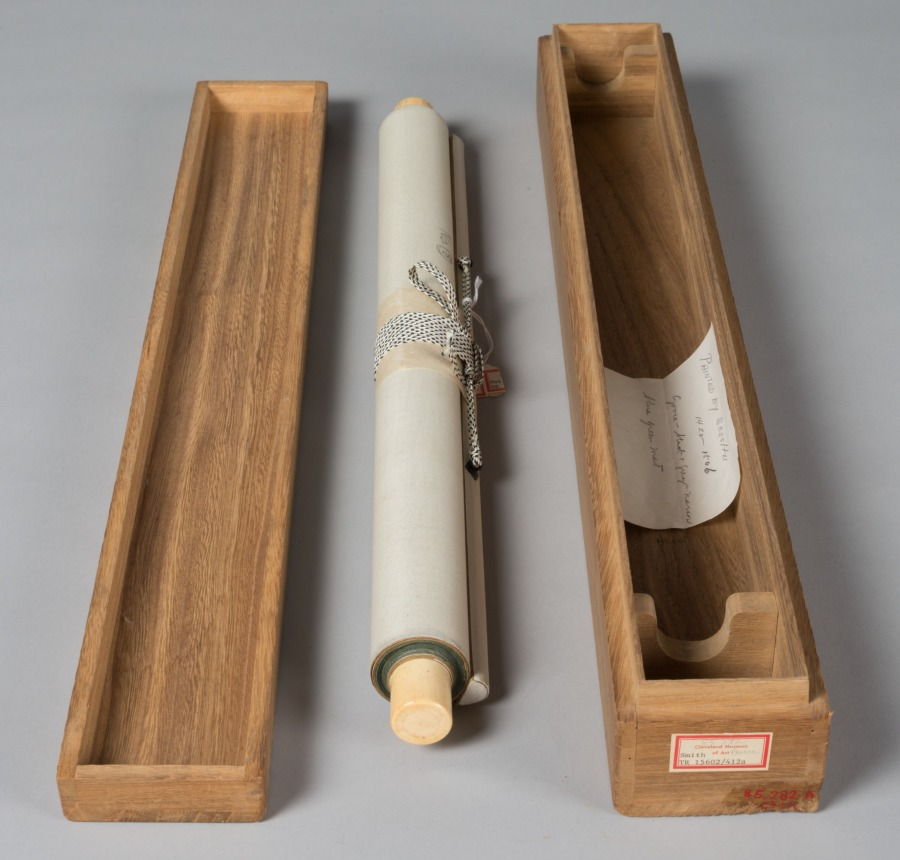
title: Goose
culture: Japan, Edo period (1615–1868)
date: c. 1615–99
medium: hanging scroll; ink on paper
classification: Painting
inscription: spurious seal of Sesshu, lower right.